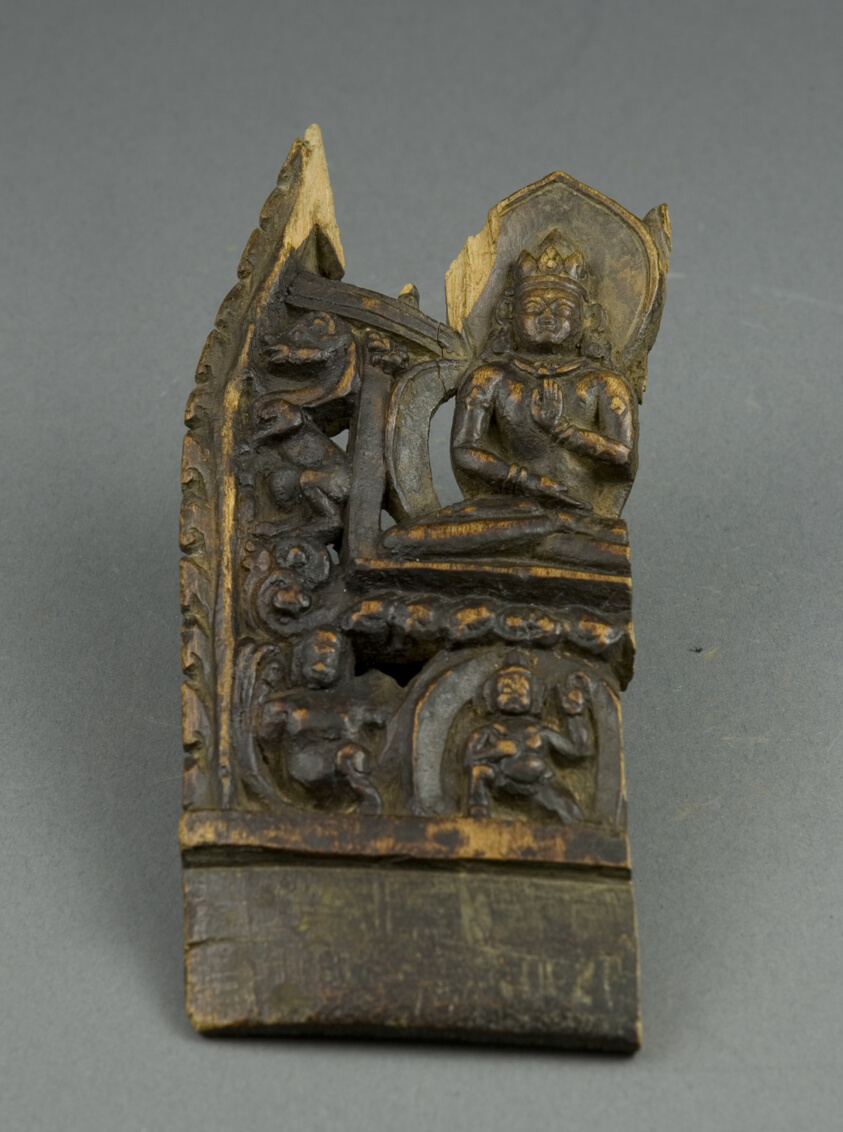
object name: Religious/Ritual Object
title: Fragment Depicting a Tathaghata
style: Himalayan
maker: Western Tibet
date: 12th century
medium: Wood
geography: Western Tibet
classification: wood; ritual objects